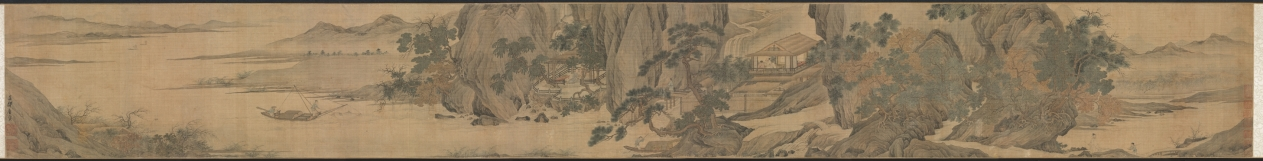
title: Scholar-Hermits in the Autumn Mountains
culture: China, Ming dynasty (1368–1644)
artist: Tang Yin (Chinese, 1470–1523)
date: 1500–1510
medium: handscroll, ink and light color on silk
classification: Painting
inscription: Artist's signature and 2 seals at end of scroll: Tang Yin [seals] T'ang Po-hu; T'ang Tzu'wei t'u-shu.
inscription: Title on frontispiece by Li Cho-kung (dates unknown).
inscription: 1 colophon and 11 additional seals: 1 colophon dated 1915 of Wu Tso-hsi (19th-20th c.); 2 seals of Gao Qifeng 高奇峰 (1889–1933); 5 seals of C. C. Wang 王季遷 (1907–2003); 4 seals unidentified.